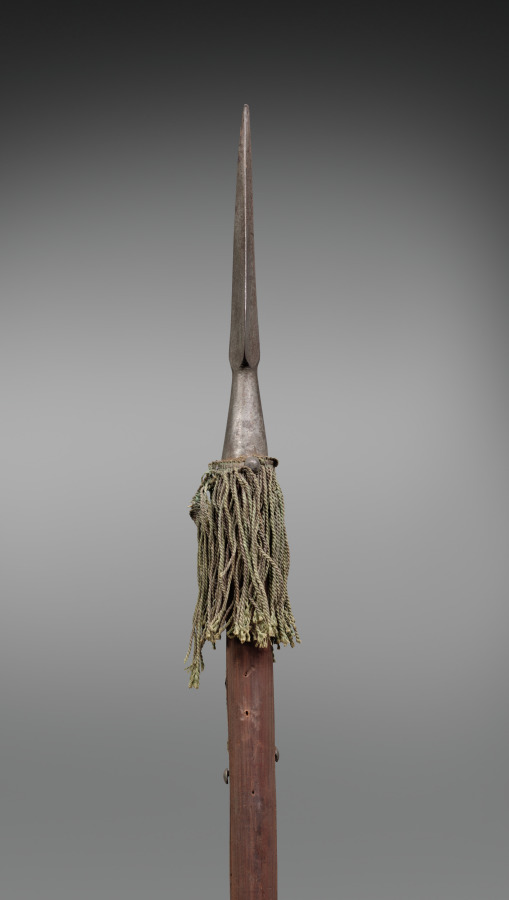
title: Pole for Banner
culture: Spain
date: 1700s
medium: wood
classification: Arms and Armor